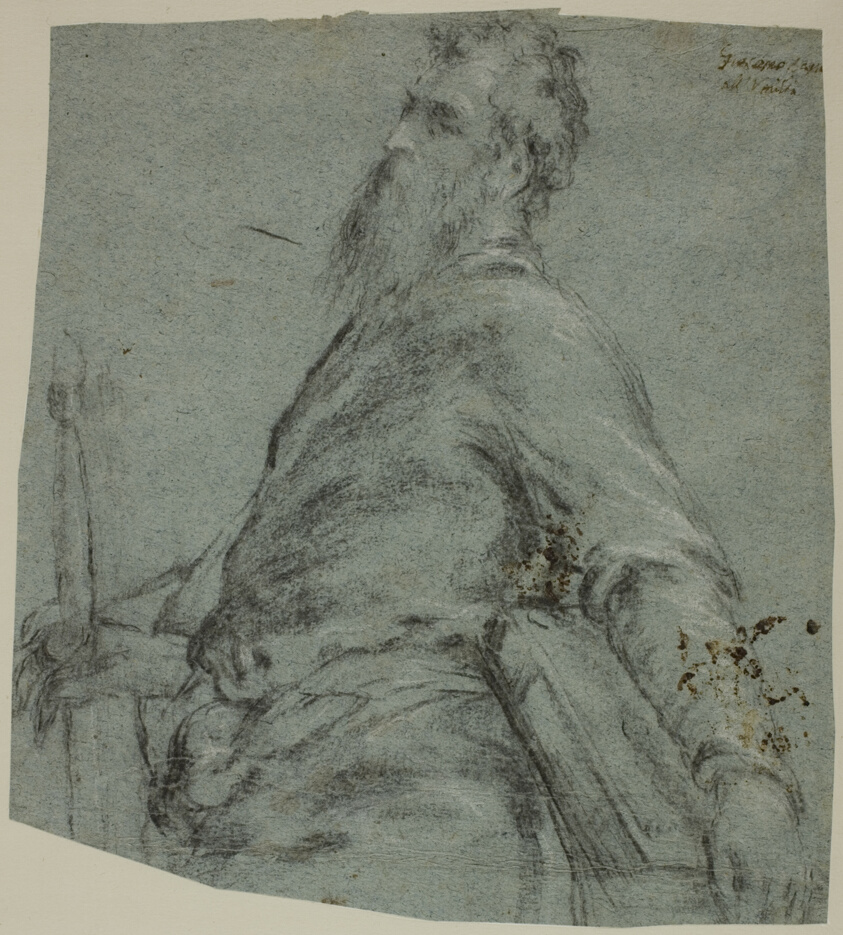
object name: Drawing and Watercolor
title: Half-length Figure Study for Saint Paul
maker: Jacopo Bassano (Italian, c. 1510-1592)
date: 1561/65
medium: Charcoal heightened with brush and lead white, on blue laid paper, edge mounted to cream wove paper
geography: Italy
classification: charcoal; drawings (visual works); prints and drawing